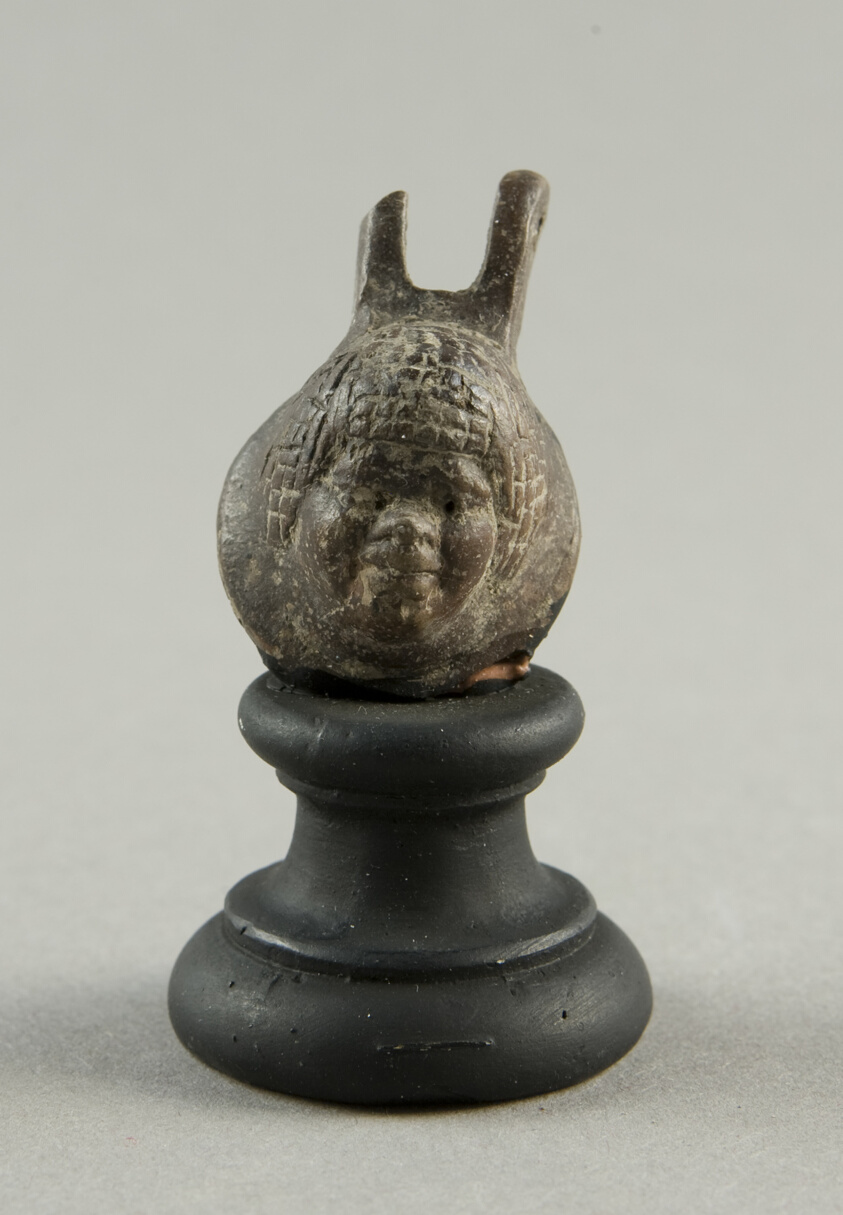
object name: Sculpture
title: Head of a Man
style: greek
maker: Greek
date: 2nd-1st century BCE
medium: terracotta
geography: Greece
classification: earthenware; ceramics; sculpture; ancient art